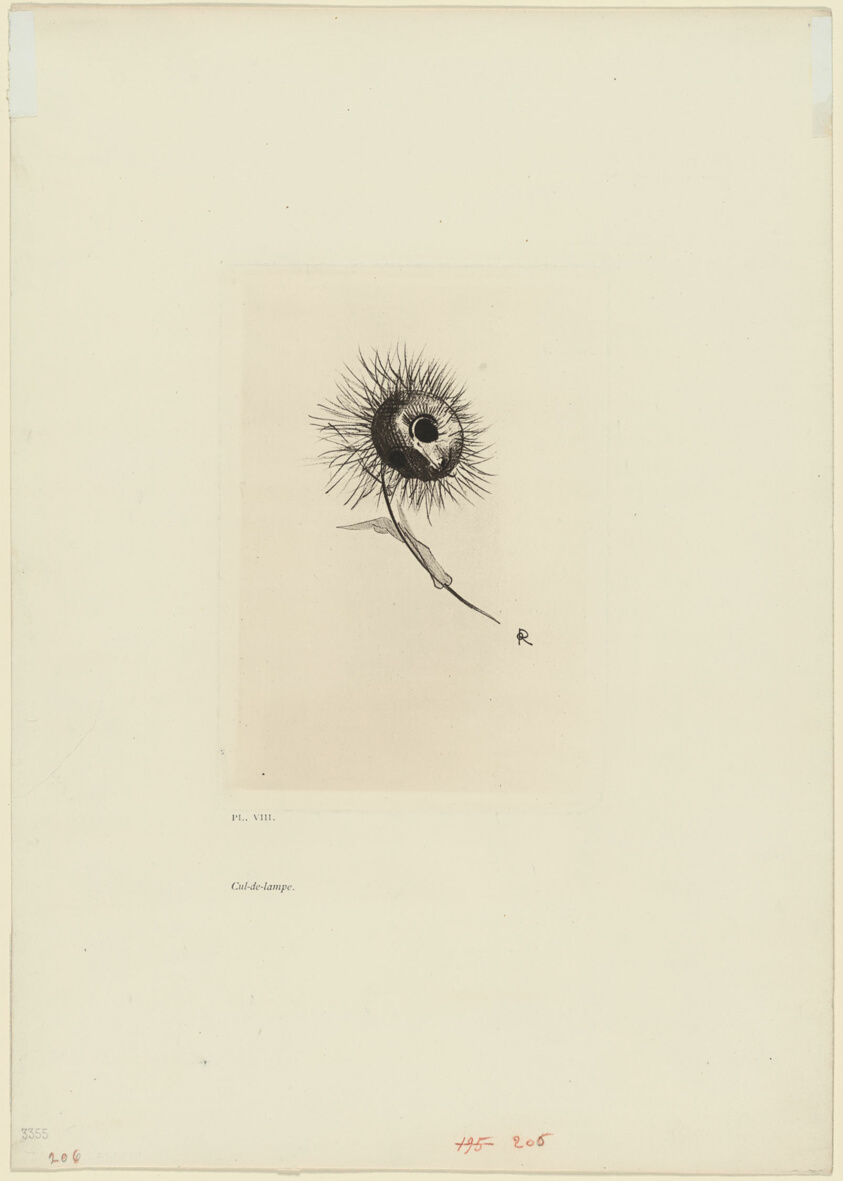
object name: Print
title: Tailpiece, plate 9 of 9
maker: Odilon Redon (French, 1840-1916)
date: 1890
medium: Photogravure made from an original drawing, in black on ivory wove paper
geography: France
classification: photogravure; reproduction; prints and drawing; print; paper